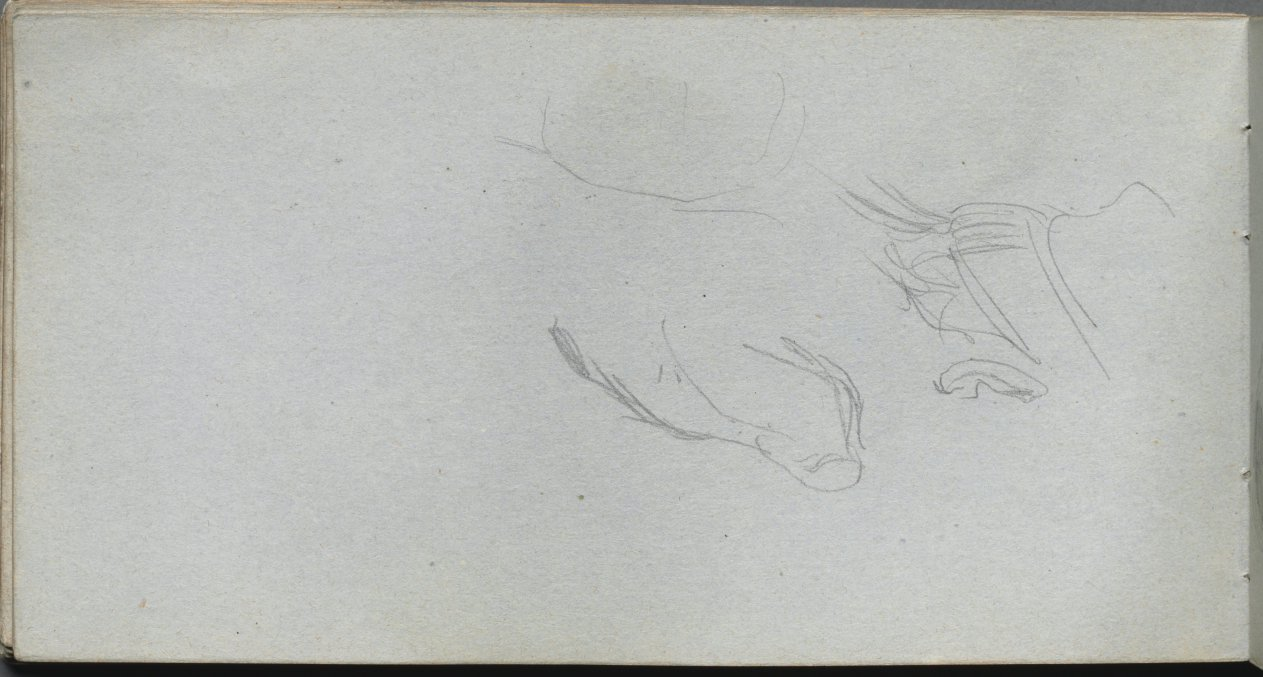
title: Sketchbook, page 72: Figure Study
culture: France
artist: Ernest Meissonier (French, 1815–1891)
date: c. 1860s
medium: graphite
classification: Bound Volume